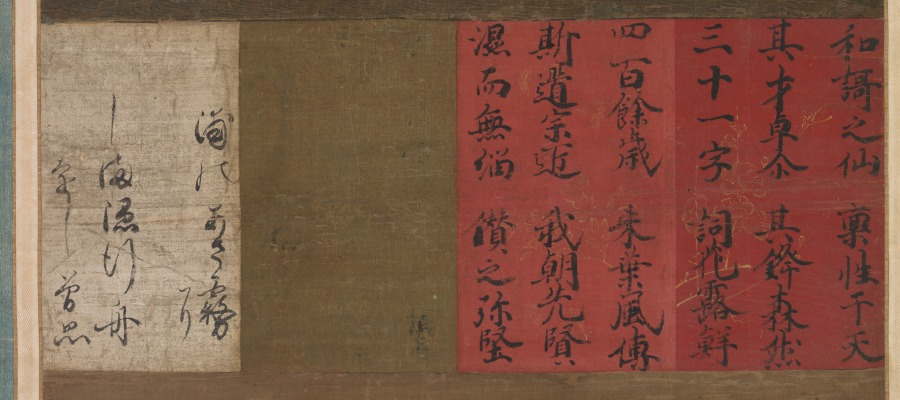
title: Kakinomoto no Hitomaro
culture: Japan, Kamakura period (1185–1333)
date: early 1300s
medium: hanging scroll; ink and color on silk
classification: Painting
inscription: 浦のあさ霧にしま隠れゆく舟をしぞ思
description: Among Japan’s greatest poets, Kakinomoto no Hitomaro’s (c. 660–724) portrait was often displayed at poetry competitions. Here, he gazes up at a falling cherry blossom, his writing box before him, brush and paper in his hands. A short biography and one of his poems are inked on painted rectangles meant to look like decorated papers. The first part of the poem has been mostly lost, but from what remains, it is possible to recognize it as Dimly, dimly in the morning mist that lies over Akashi Bay, my longings follow with the ship that vanishes behind the distant isle. —Translated by Robert H. Bower and Earl Roy Miner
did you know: The landscapes at the top and bottom of the painting depict Akashi Bay, with its famous pines along the shore, and a lone figure in a boat.